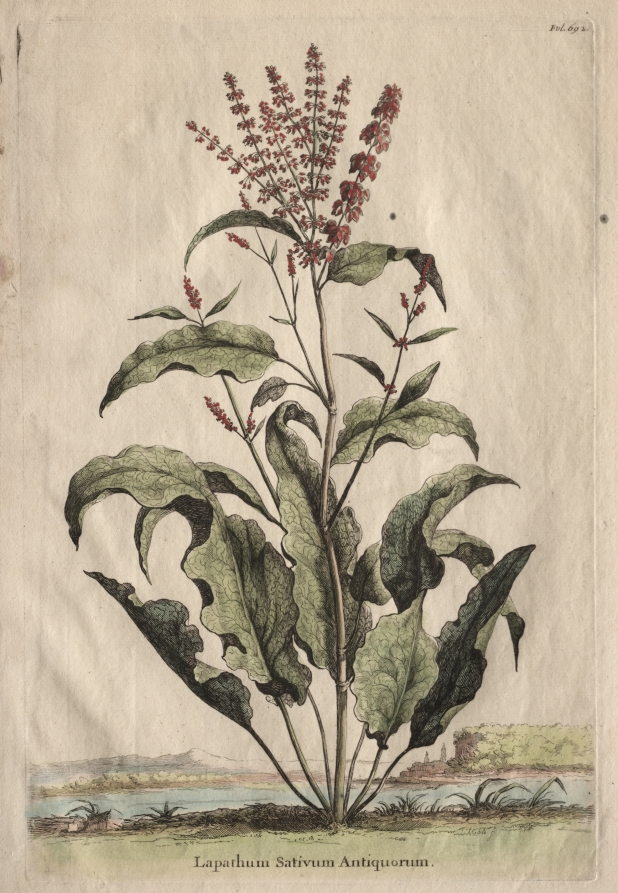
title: Phytographia Curiosa: Lapathum Sativum Antiquorum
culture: Netherlands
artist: Abraham Munting (Dutch, 1626–1683)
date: 1651–83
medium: etching, hand colored with watercolor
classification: Print